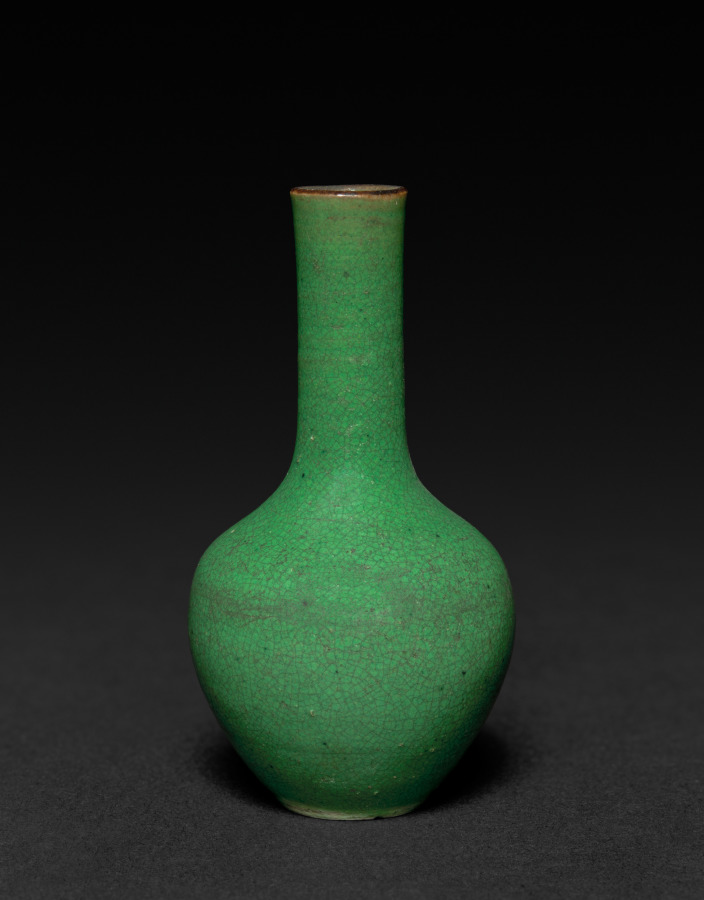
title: Vase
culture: China, Qing dynasty (1644-1911)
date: 1644–1911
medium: porcelain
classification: Ceramic